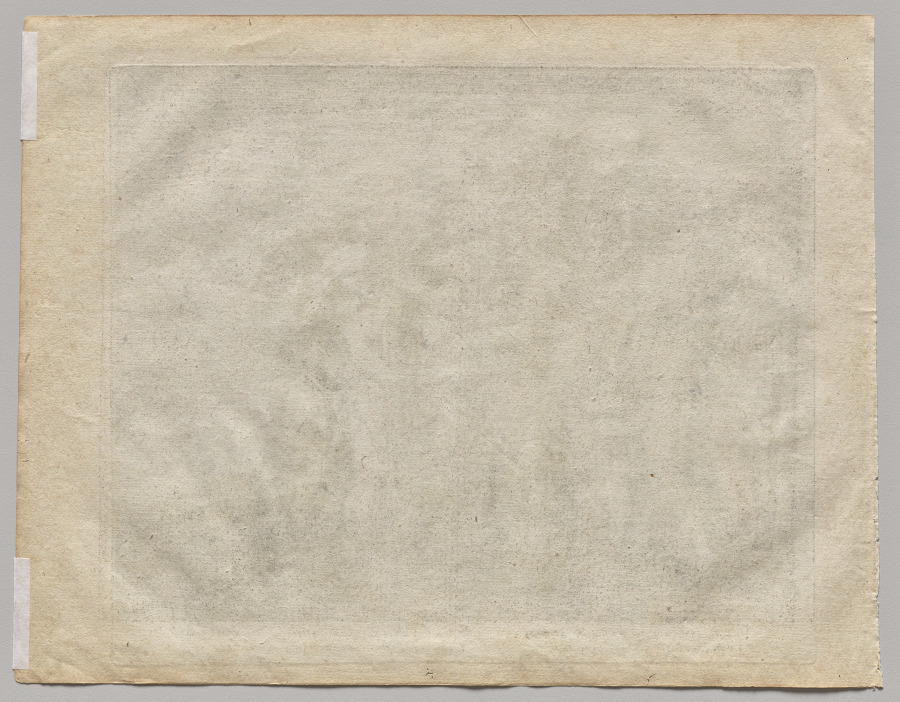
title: The Seed Received among the Thorns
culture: Netherlands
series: Parable of the Sower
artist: Philip Galle (Flemish, 1537–1612)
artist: after Gerard P. van Groningen (Netherlandish, active late 1500s)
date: 1574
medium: engraving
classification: Print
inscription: Watermark not identified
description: This is one of a series of four prints portraying the biblical parable of the sower, made in Antwerp (in present-day Belgium) at the end of the 1500s. The parable compares types of soil to people in the world: one hardened; one fickle; one distracted by things of the world; and one with an open heart, ready to accept God. The third sower (here, portrayed as a pilgrim) distractedly throws seeds among thorns. He is surrounded by two female personifications—Cares of the World, and Avarice (extreme greed for money)—indicating the source of his distraction from religious piety. This print relates to a preparatory drawing in the museum’s collection (2012.4).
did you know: The female figure at left, representing Avarice, carries a large, laden moneybag in her right hand.